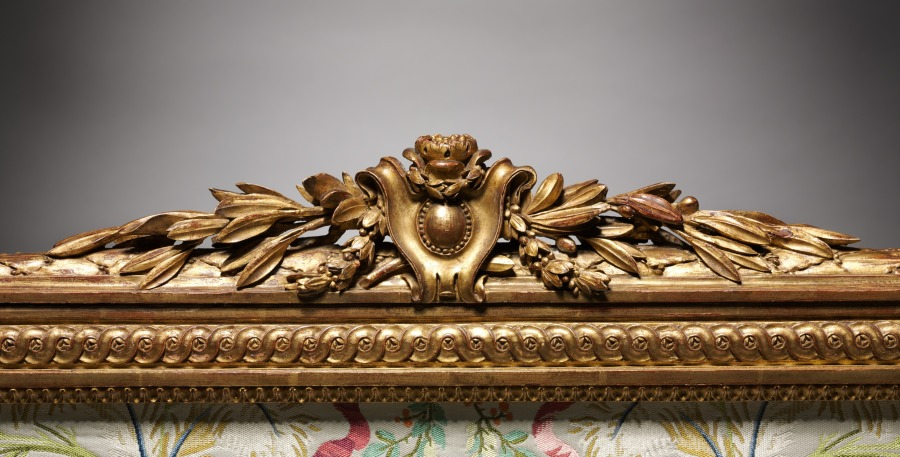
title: Fire Screen (Écran de Cheminée)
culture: France, Paris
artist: Georges Jacob (French, 1739–1814)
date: c. 1780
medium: gilt wood, upholstery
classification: Furniture and woodwork